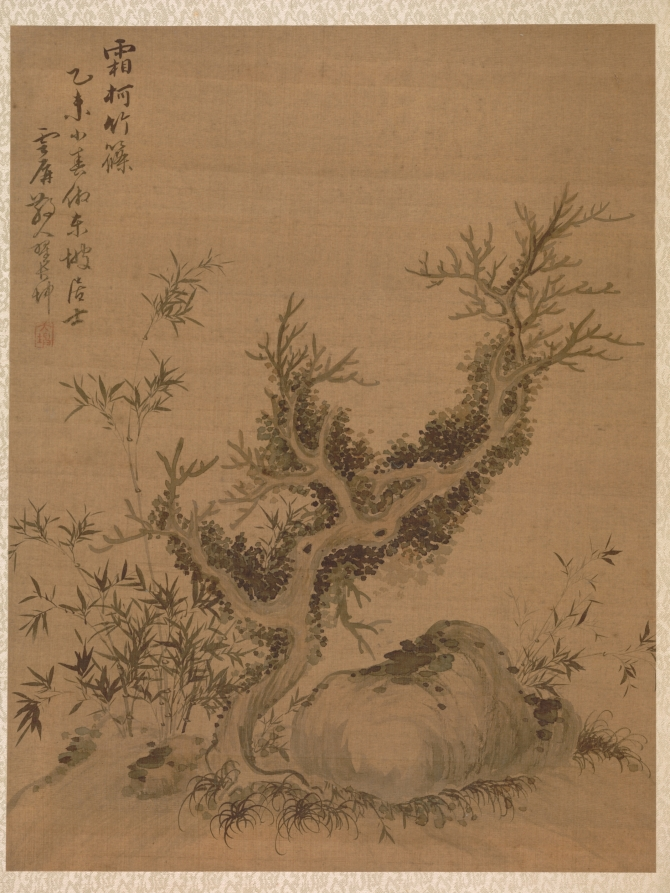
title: Frosted Branches and Dwarf Bamboo, in the Style of Su Shi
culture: China, Qing dynasty (1644-1911)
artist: Zhai Dakun (Chinese, d. 1804)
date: 1775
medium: album leaf; ink and color on silk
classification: Painting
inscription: Hoary ("Frosted") Branches and Dwarf Bamboo. In the tenth month of the year yiwei (1775), in the manner of Dongpo jushi (Su Shi, 1036–1101). Yunping jingren Zhai Dakun. Seal: r/r "Dakun"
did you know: The inscription says that this painting is done in the style of the Song dynasty period artist and poet Su Dongpo 蘇東坡 (1037–1101), who was also known as Su Shi.